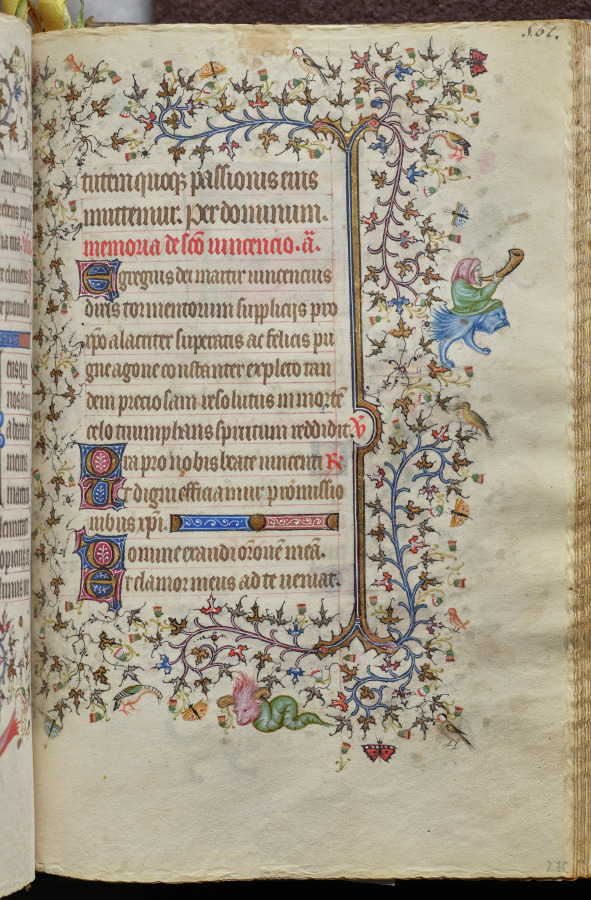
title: Hours of Charles the Noble, King of Navarre (1361-1425): fol. 275r, Text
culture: France, Paris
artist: Master of the Brussels Initials and Associates (French)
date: c. 1405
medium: ink, tempera, and gold on vellum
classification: Bound Volume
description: This precious volume was obviously highly prized by its owner, the French-born King of Navarre, who had his coat of arms painted on no less than twenty folios. Rather than directly commissioning this manuscript from a specific workshop, it seems that Charles the Noble acquired his book of hours -- perhaps ready-made for the luxury market -- while on a trip to Paris in 1404-05. A collaborative effort, six painting styles are evidenced within the pages of this codex, those of two Italians, two Frenchmen, and two Netherlanders. The painter who was responsible for the planning and decoration of the book, and who produced seventeen of the large miniatures, was a Bolognese artist known as the Master of the Brussels Initials. His principal assistant, responsible for most of the borders, was a Florentine who signed his name "Zecho" da Firenze on folio 208 verso.